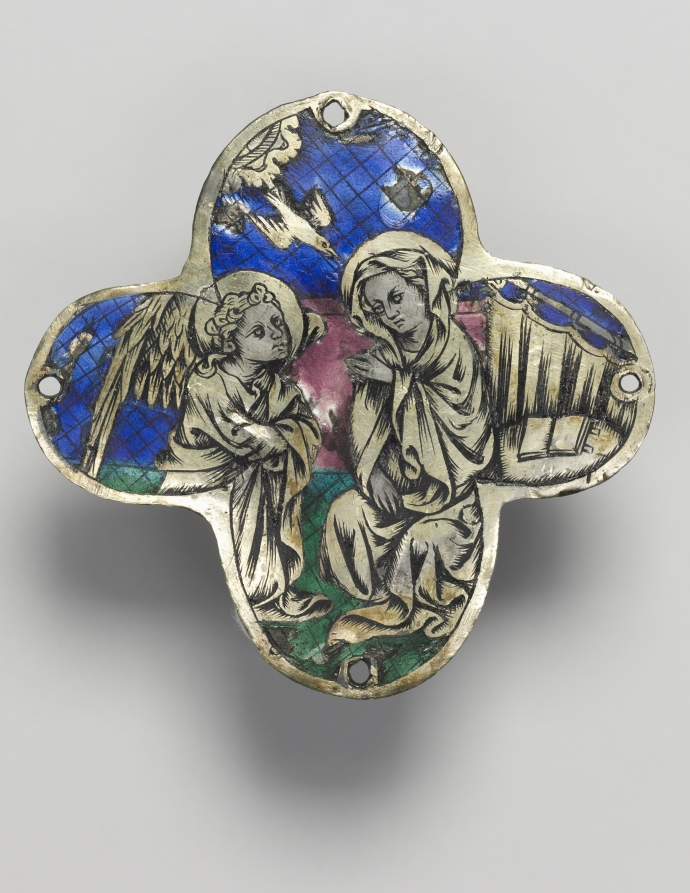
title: Quatrilobed Plaque: The Annunciation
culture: Spain, Catalonia?, 14th century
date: c. 1350–1400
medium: translucent enamel (basse-taille) on silver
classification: Enamel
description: These plaques were probably originally placed at the end of the arms of a processional cross. They are decorated in an enameling technique called basse-taille in which colorful translucent enamel pastes are fused over an engraved and chased silver plaque.